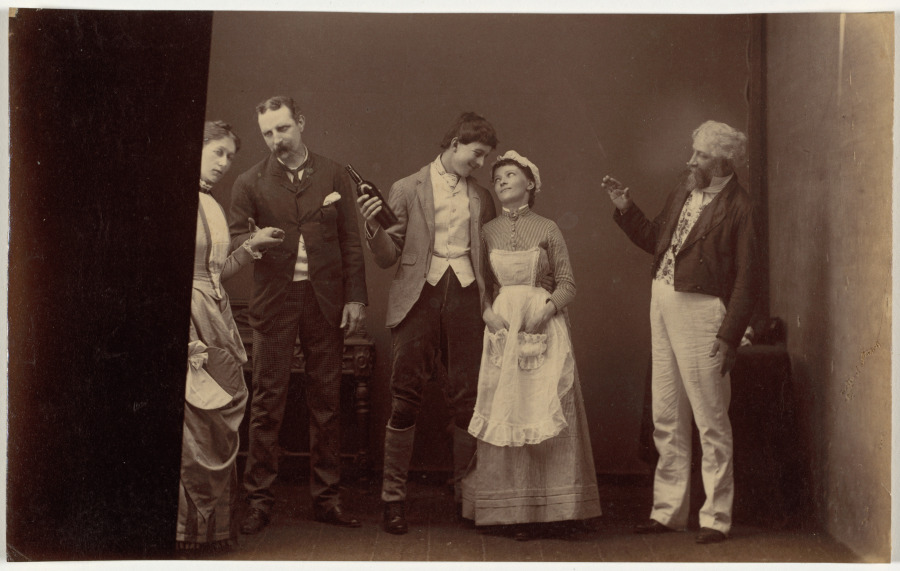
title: Fancy Group, Indore II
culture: India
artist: Raja Deen Dayal (Indian, 1844–1905)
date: 1886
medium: albumen print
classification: Photograph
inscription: Stamped in black ink on verso: “31.7I” Written in pencil on verso: “2466”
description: Entertainments at “fancy dress” or costume parties often included amateur theatricals or tableaux vivants—static scenes drawn from literature, history, or artworks. Here, Deen Dayal captured three moments distilled from a popular novel or play. The guests—all middle or upper class—perform as characters ranging from the working class to ladies and gentlemen. Because the photographic technology of the time required strong daylight, the photographs would have been made on a separate occasion, not at the party.